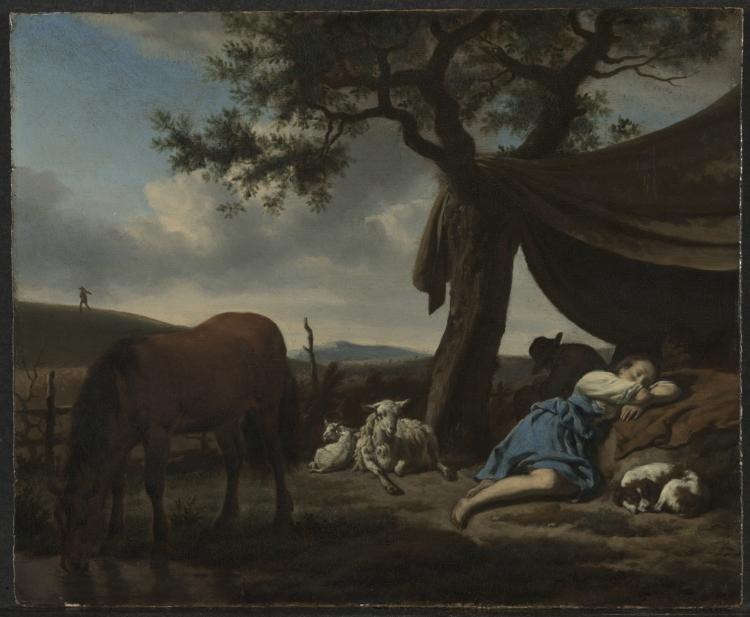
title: Sleeping Shepherds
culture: Netherlands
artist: Adriaen van de Velde (Dutch, 1636–1672)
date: 1663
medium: oil on wood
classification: Painting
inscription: Signed lower right: "A.v.Velde. f / 1663"